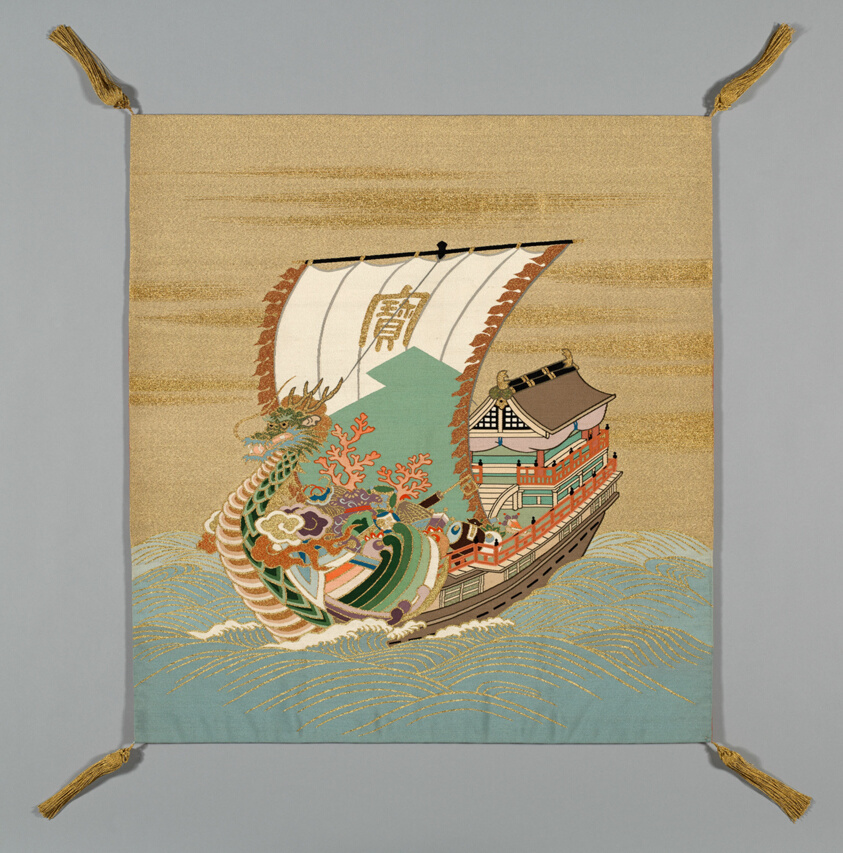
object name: Textile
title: Fukusa (Gift Cover)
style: late edo, meiji, edo (japanese period), Japanism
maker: Japan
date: late Edo period (1789–1868)/ Meiji period (1868–1912), 19th century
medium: Mon side: silk, gold-leaf-over-lacquered-paper-strip wrapped silk, slit and single dovetailed tapestry weave (tsuzure); pattern side: silk, gold-leaf-over-lacquered-paper-strip-wrapped silk, slit and single dovetailed tapestry weave (tsuzure); corners: gold-leaf-over-lacquered-paper-strip wrapped cotton, 1:1 tubular oblique interlacing over cotton core, knotted; gold-leaf-over-lacquered-paper-strip-wrapped silk wrapped cotton ball, and re-plied fringe tassels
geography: Japan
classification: textile; weaving